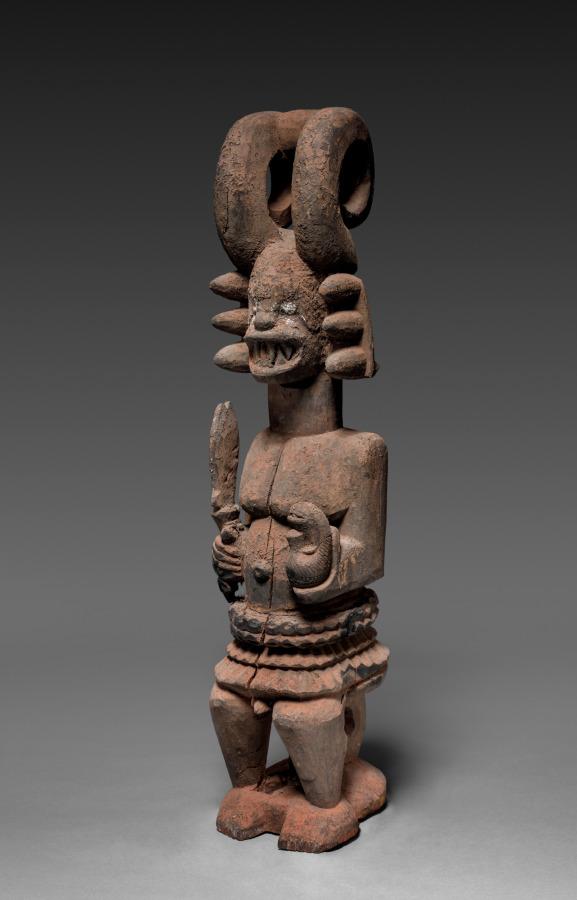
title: Shrine Figure (Ikenga)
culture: Africa, West Africa, Nigeria, Igbo carver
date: possibly early 1900s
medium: Wood, organic materials, and raffia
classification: Sculpture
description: This seated figure of a man holding a cutlass and an inverted human skull is a cult object called ikenga, associated with achievement and success. Standing at the center of a man’s personal shrine, the sculpture receives prayers and sacrifices in return for the ancestors’ guidance. An elaborate headdress comprising two horn-like extensions reinforces the cult’s preoccupation with masculinity, while facial incisions known as ichi refer to membership in one of many male associations.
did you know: This figure associated with achievement and success would have received prayers and sacrifices in return for the guidance of ancestors.